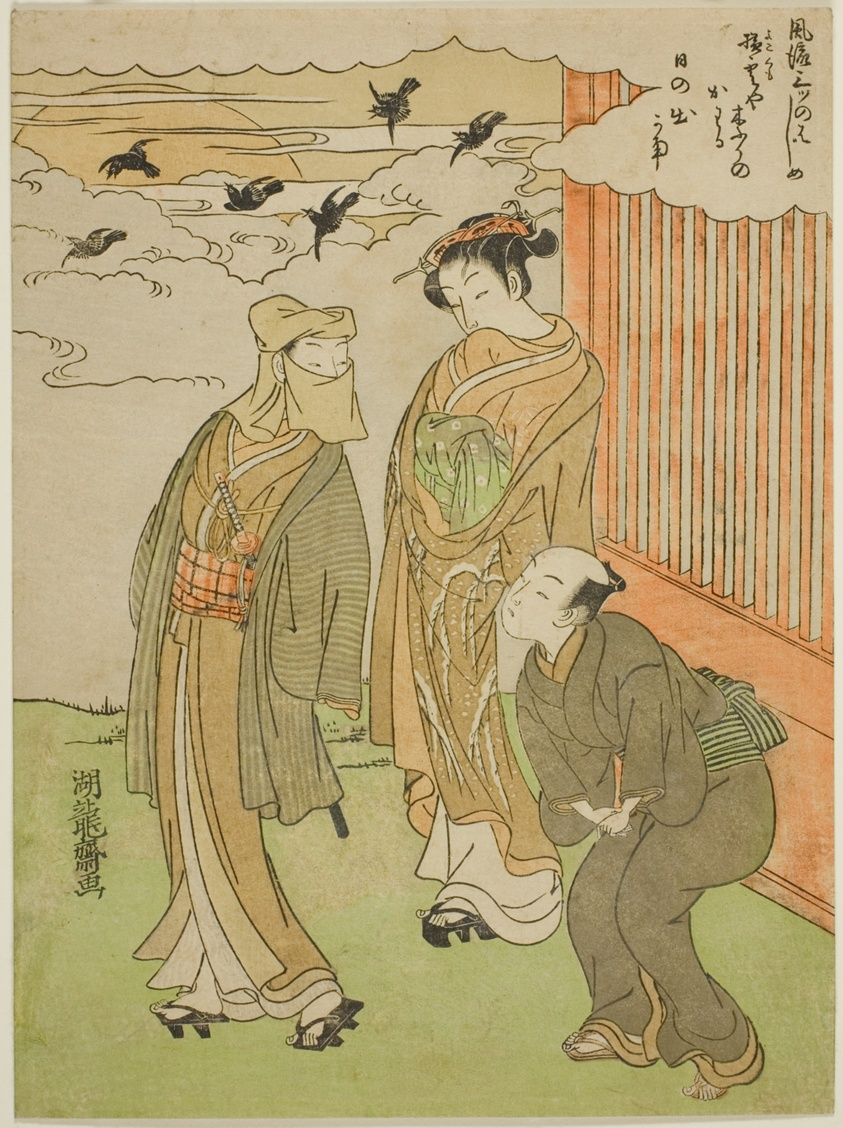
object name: Print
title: Sunrise, from the series "Fashionable Three Beginnings (Furyu mittsu no hajime)"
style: Japanese (culture or style)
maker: Isoda Koryusai (Japanese, 1735-1790)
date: c. 1770/72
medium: Color woodblock print; chuban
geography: Japan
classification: woodblock print; print; asian art